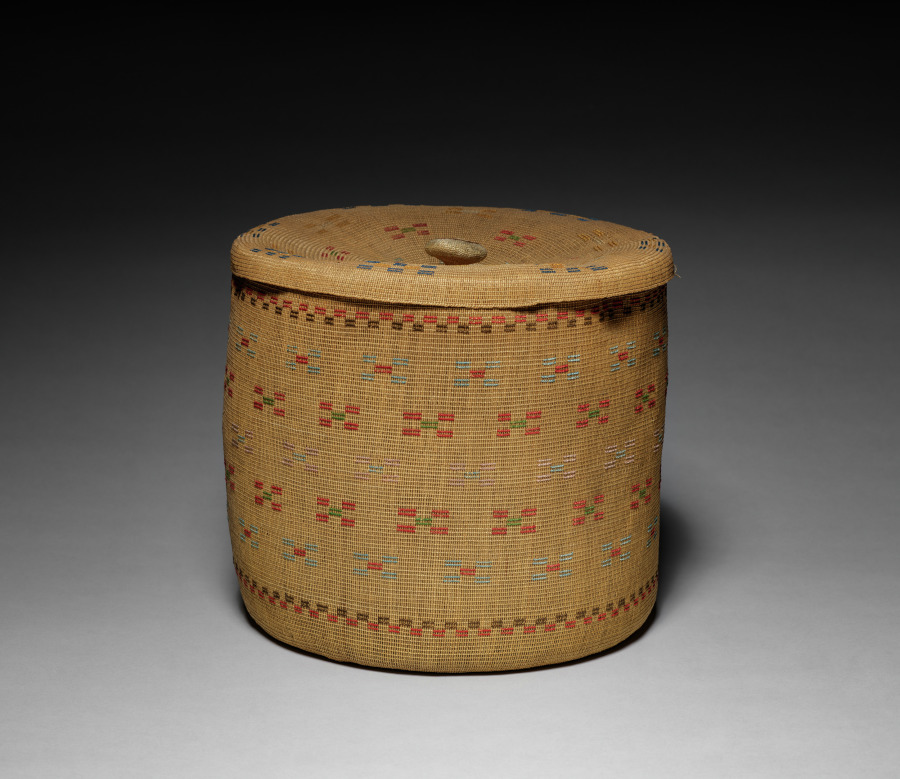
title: Covered Twined Cylindrical Basket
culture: Arctic. Aleut (Attu), late 19th-early 20th century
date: late 1800s–early 1900s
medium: twined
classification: Basketry